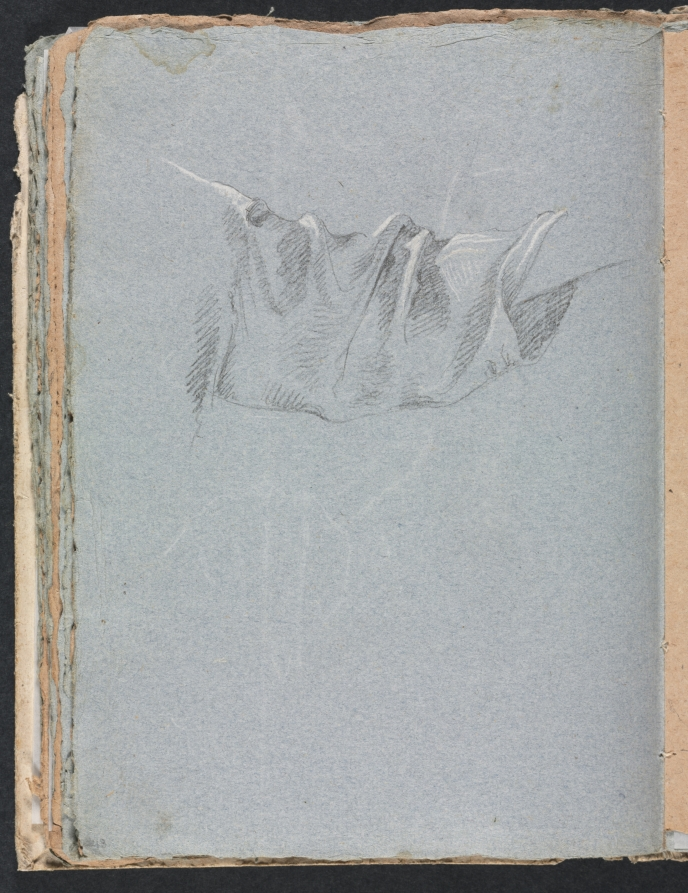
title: Verona Sketchbook: Drapery study (page 48)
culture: Italy, 18th century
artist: Francesco Lorenzi (Italian, 1723–1787)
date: 1760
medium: black chalk with white heightening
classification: Bound Volume